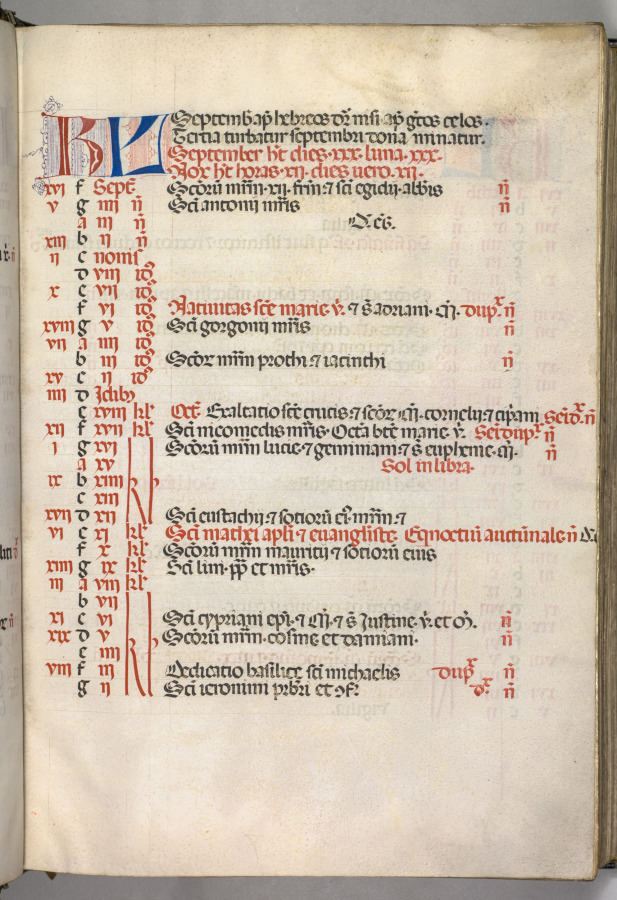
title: Missale: Fol. 7r: September Calendar Page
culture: Italy, Perugia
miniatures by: Bartolommeo Caporali (Italian, c. 1420–1503)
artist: assisted by Giapeco Caporali (Italian, d. 1478)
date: 1469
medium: ink, tempera and burnished gold on vellum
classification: Bound Volume